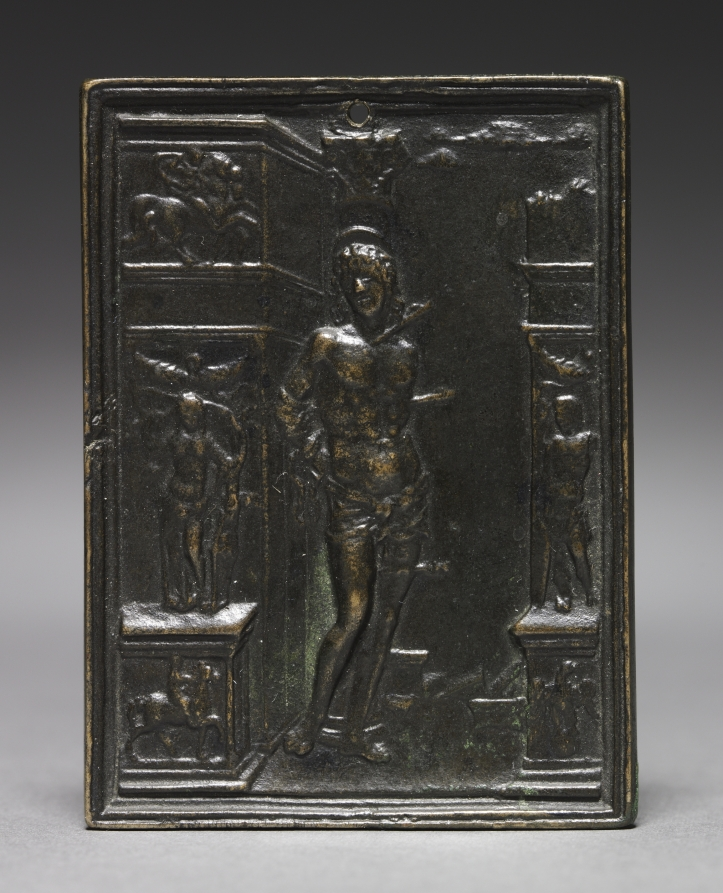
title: Saint Sebastian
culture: Italy, 16th century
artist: Moderno (Italian, 1467–1528)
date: c. 1500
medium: bronze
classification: Sculpture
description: The Corinthian capital on the central column, the broken pier with reliefs of Mars and an eagle, and the pier at left with equestrian groups around an image of Venus are all ancient motifs Moderno encountered in Rome. Originally from Verona, Moderno combined this monumental classicism of Rome with his Northern Italian roots, particularly the interest in humanism he absorbed at the court of Renaissance Ferrara. Despite the torture of arrows piercing Saint Sebastian's body, the strong musculature and graceful twist of his seminude body reflect the Renaissance ideals of beauty befitting a holy martyr.